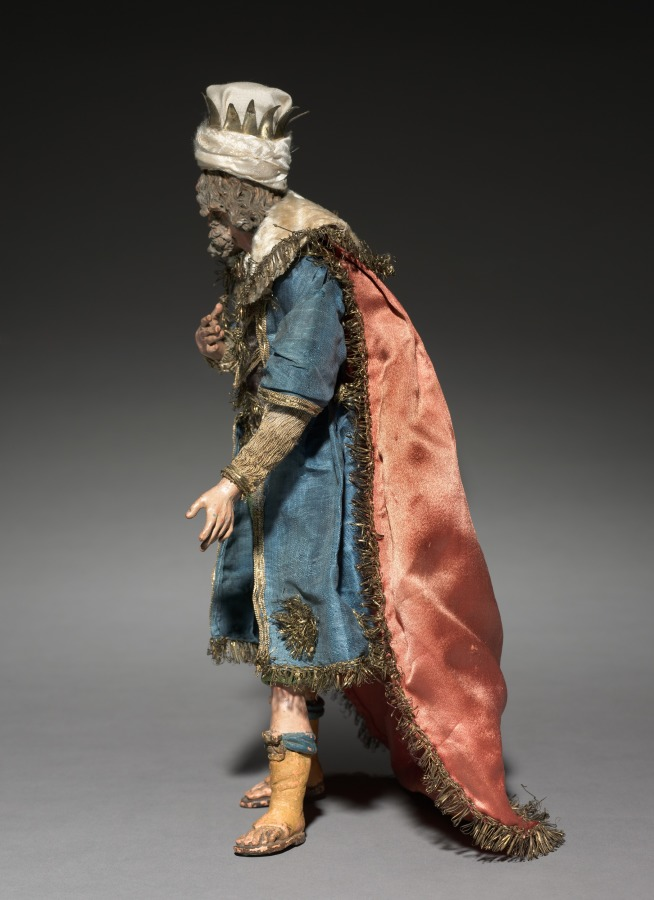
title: Figure from a Crèche: Magus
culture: Italy, Naples, late 18th-early 19th century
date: 1780–1830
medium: painted wood and terracotta with various textiles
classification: Sculpture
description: The practice of creating scenes of the Nativity for the home dates from the early 1700s in Italy, where people began to set up doll-like figures of about a foot or less in height. The custom was particularly popular in Naples around 1800, where crèche scenes (crèche means cradle, or crib) included many figures, whose heads and hands of painted terracotta, stuffed cloth bodies, and clothing adapted from contemporary local costumes gave them an amazingly realistic character. Representations of the birth of Jesus can be traced to the first few centuries of Christianity. Both living creatures and sculptural depictions of them were used from early times. By the late middle ages it was customary to create life-size figures of wood or stone, naturalistically painted, to represent the characters who participated in the events of Jesus's early life. These sculptures were then arranged in scenes illustrating one or both of the most important of these events, the Adoration of the Shepherds and the Adoration of the Magi-the three kings from the East who came to pay homage to the Christ child. Used in churches, these large figures were especially popular in Italy, Central Europe, Spain, and Portugal. This Object in Focus presentation was organized by Henry Hawley, Curator of Renaissance and Later Decorative Arts and Sculpture.